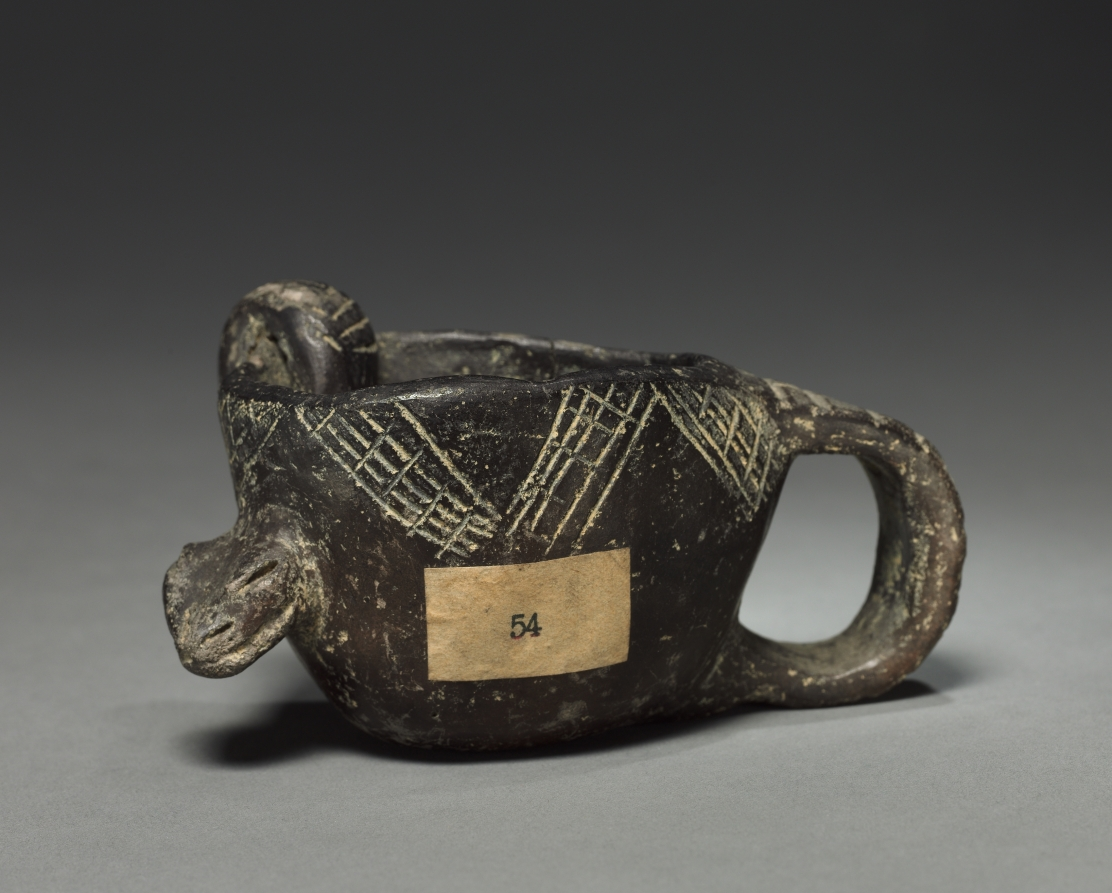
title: Dish with Handle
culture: Colombia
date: before 1921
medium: pottery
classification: Ceramic